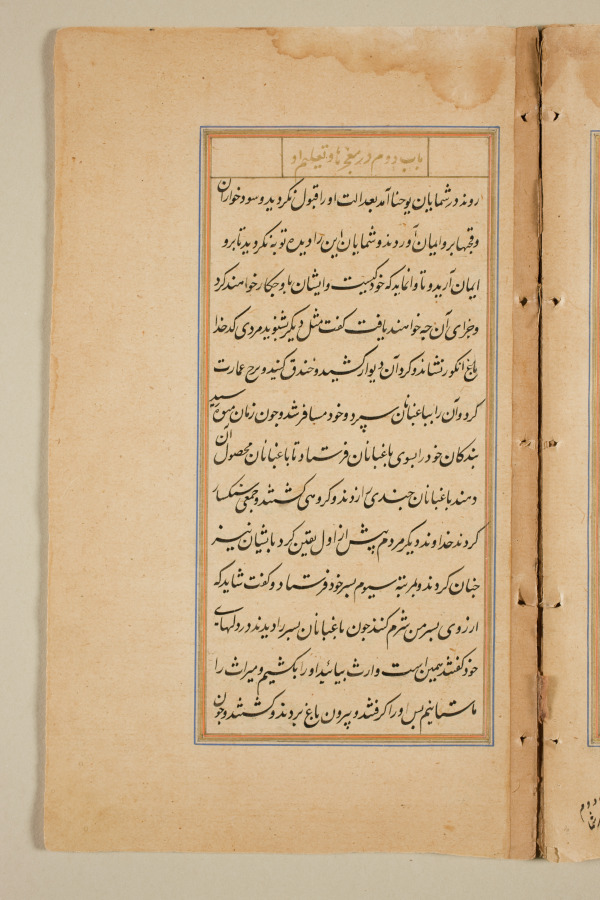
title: Text page from a Mirror of Holiness (Mir’at al-quds) of Father Jerome Xavier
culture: Mughal India, Allahabad, made for Prince Salim (1569–1627)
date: 1602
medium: Ink and gold on paper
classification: Manuscript